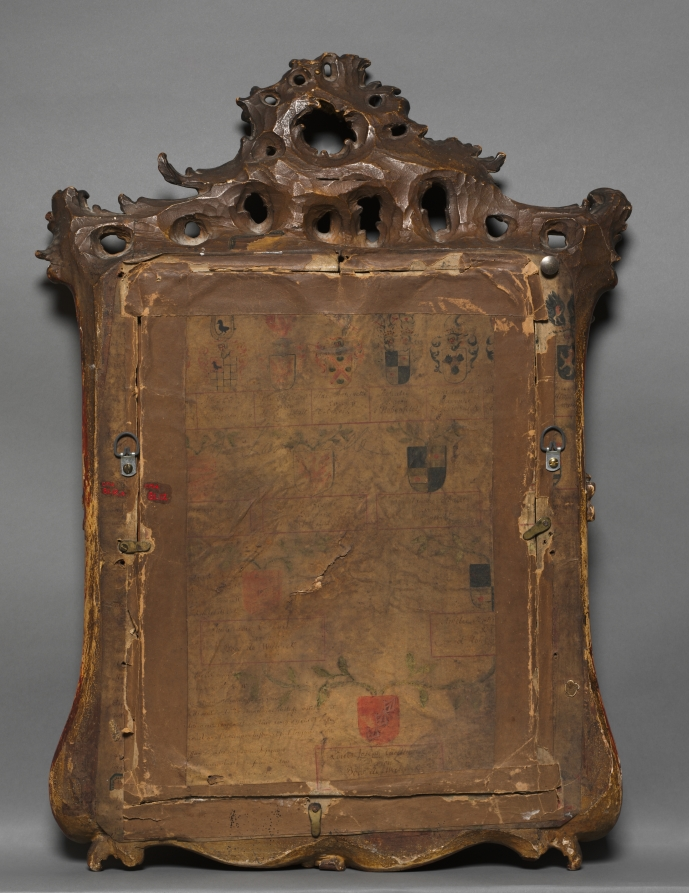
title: The Annunciation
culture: Germany, 18th century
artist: Johann Michael Düchert (German, 1725–1799)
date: 1750s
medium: ivory, ebony, velvet, in the original gilded and glazed frame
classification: Sculpture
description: This object entered the collection attributed to the German sculptor Johann Paul Egell. However, this attribution never sat comfortably because Egell mostly worked on large-scale commissions in stone, stucco, and wood, rather than with these more precious materials. Recent research indicates that the work is by Düchert, one of Egell's most gifted students, who translated Egell's distinct visual language—the elongated figures, tiny heads, unusually flattened space, and planar handling of drapery—into small-scale ivories.